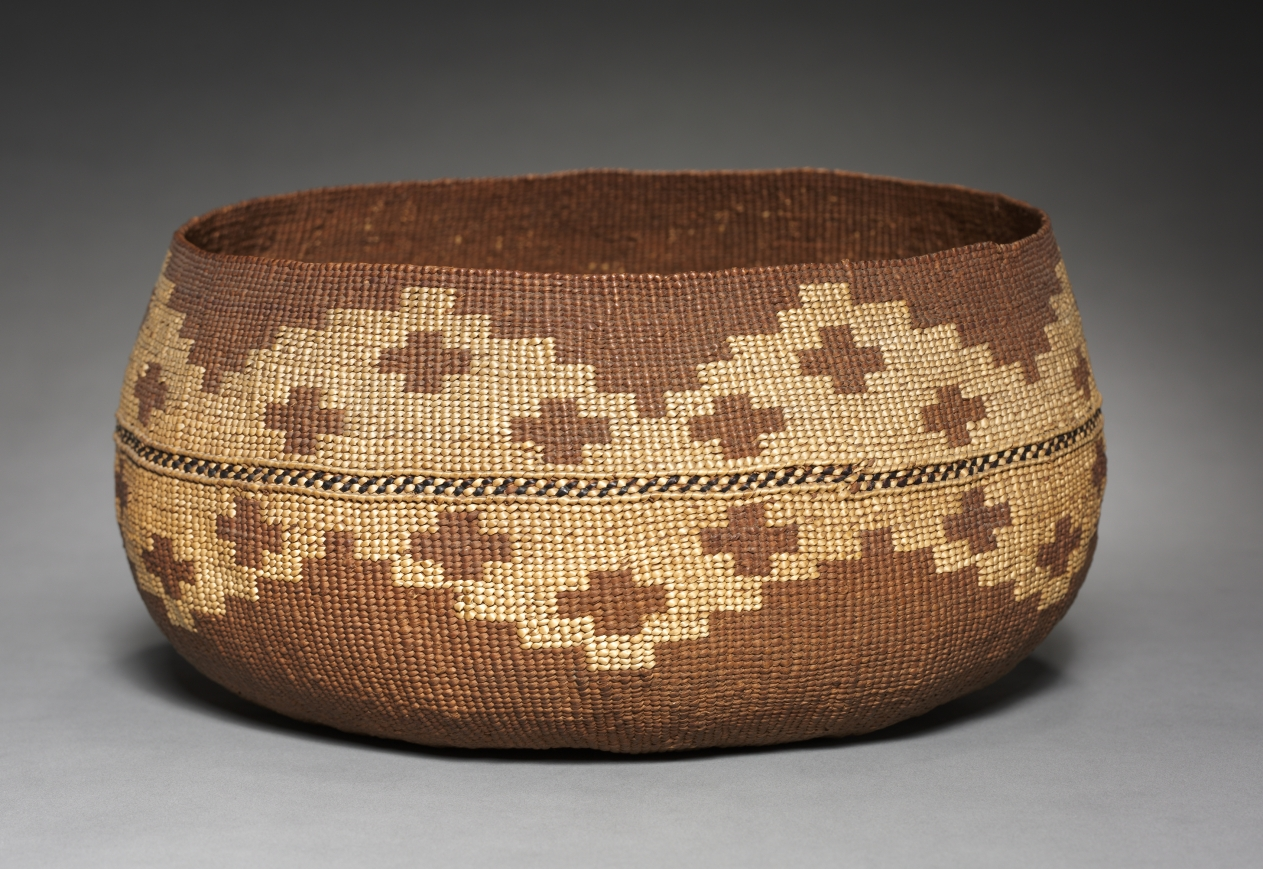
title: Cooking Bowl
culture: California, Karok or Hupa, Unassigned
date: Unassigned, before 1942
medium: twined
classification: Basketry